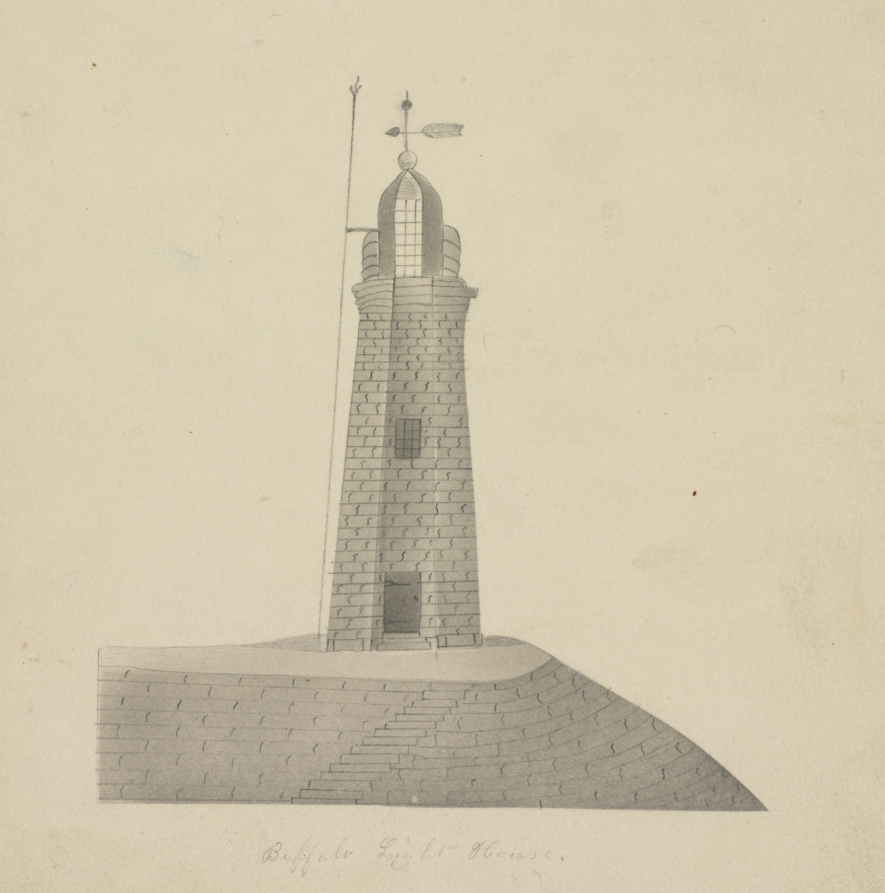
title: Buffalo Lighthouse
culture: America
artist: Mary Altha Nims (American, 1817–1907)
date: 1800s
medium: pencil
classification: Drawing